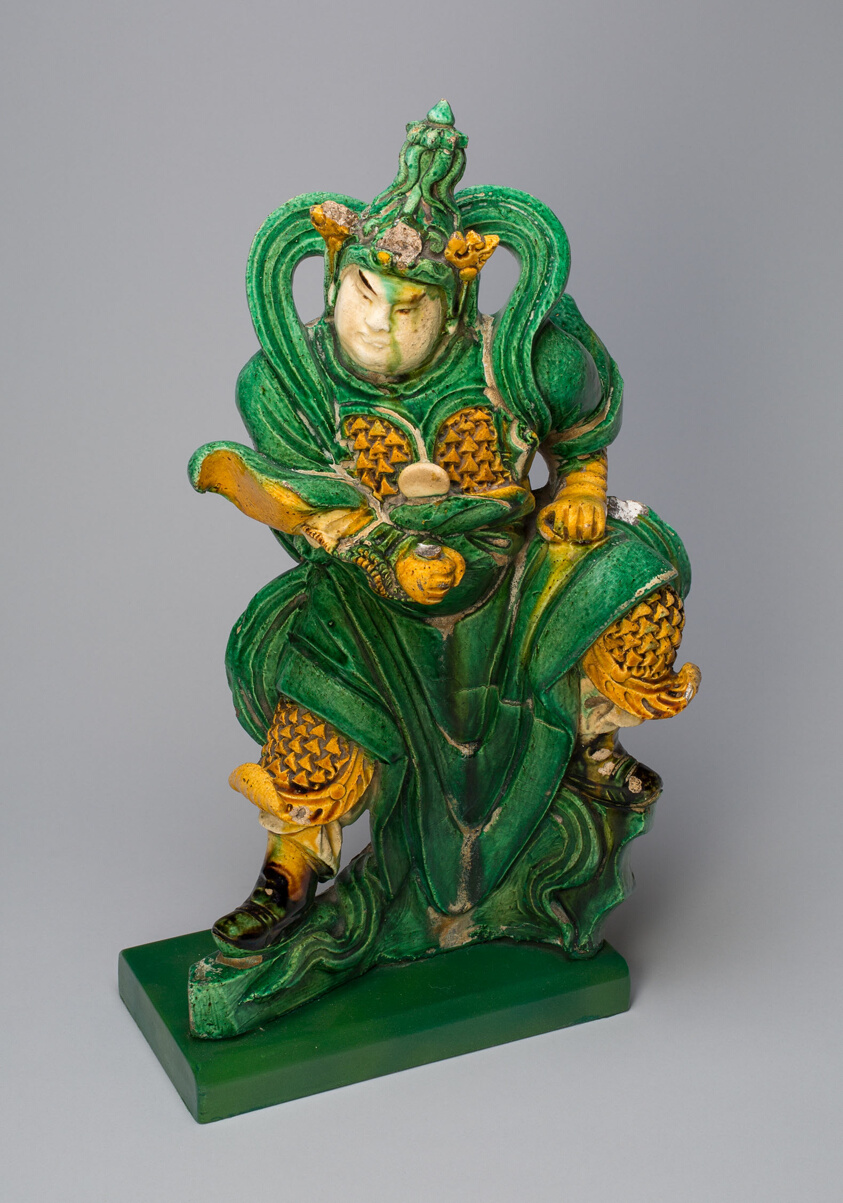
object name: Architectural fragment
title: Roof Tile with Guardian Figure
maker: China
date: Ming dynasty (1368–1644) or Qing dynasty (1644–1911), c. 17th century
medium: Earthenware with green and yellow glazes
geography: China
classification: earthenware; asian art; ceramics; architectural fragment